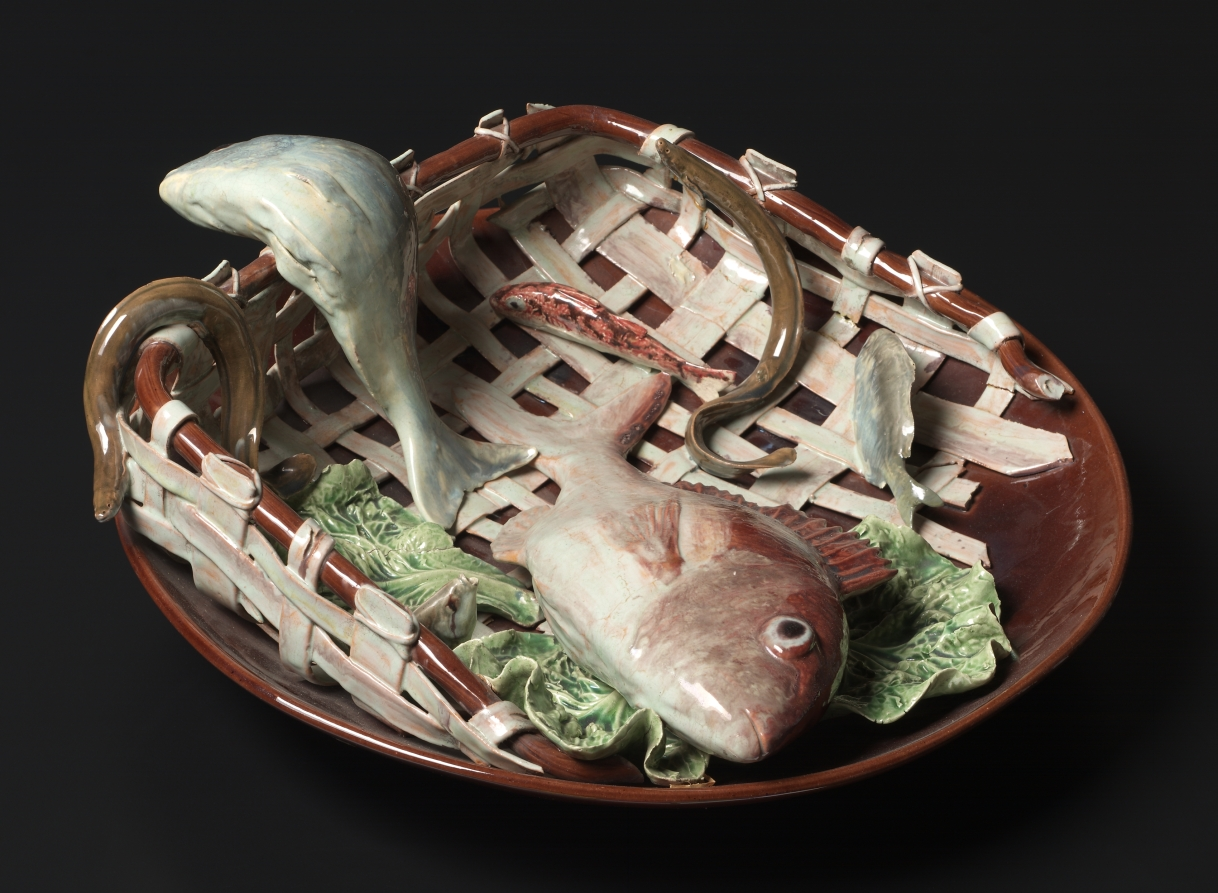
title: Plate with Fish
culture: Portugal, Caldos de Rainha, 19th century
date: 1896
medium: earthenware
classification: Ceramic